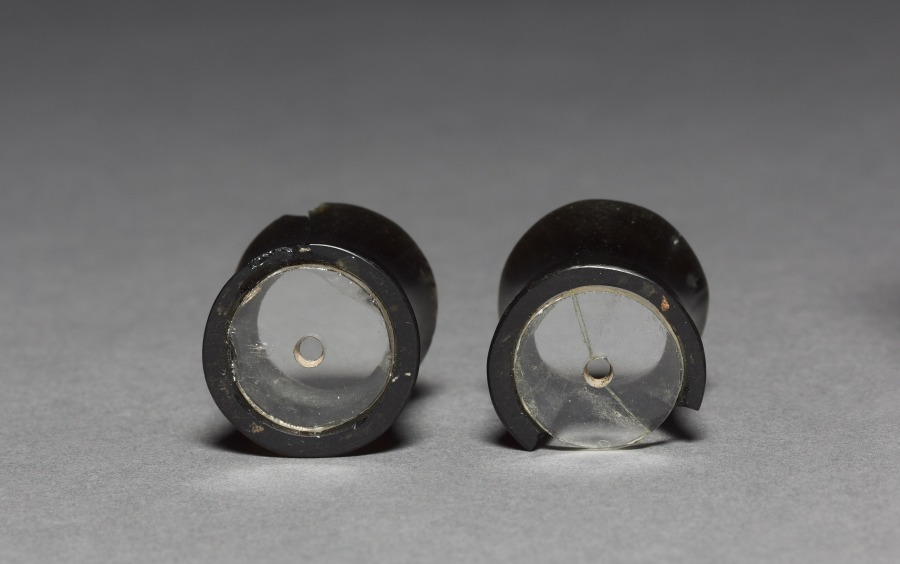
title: Pair of Ear Ornaments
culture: Mexico, Guerrero, Ichcatiopan, Mixtec or Aztec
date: c. 1200–1519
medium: obsidian, crystal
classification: Jewelry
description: This set of ear ornaments, each with a rock crystal insert, is said to have been found with a pendant made of jade and gold (1983.190). They may come from a buried offering or the tomb of an Aztec noble.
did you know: These obsidian ear ornaments look black but have a golden sheen.